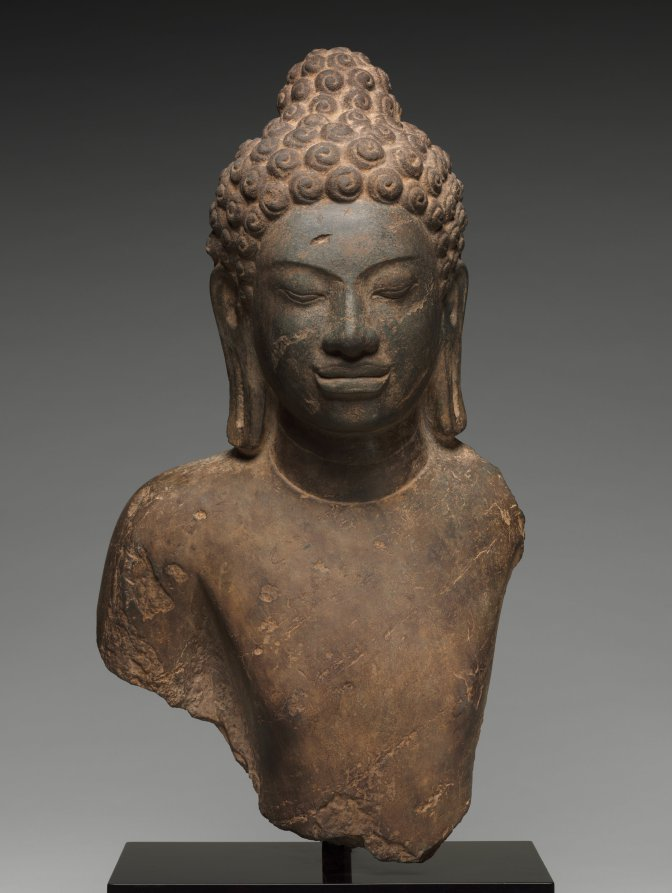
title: Bust of Buddha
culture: Central Thailand, Dvaravati, Mon-Dvaravati style, 7th-9th Century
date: c. 700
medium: limestone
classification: Sculpture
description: While the iconographic elements, such as elongated earlobes, cranial protuberance, and snail-shell curls derived from India, the local Mon people of Thailand gave their unique expression to the facial features of the Buddha. The beauty of sharply delineated eyes and stylized curling full lips was appreciated among the Mon, and these features impart an almost piercing serenity that is distinctive to Thai images from this early period of sculptural production in Southeast Asia.